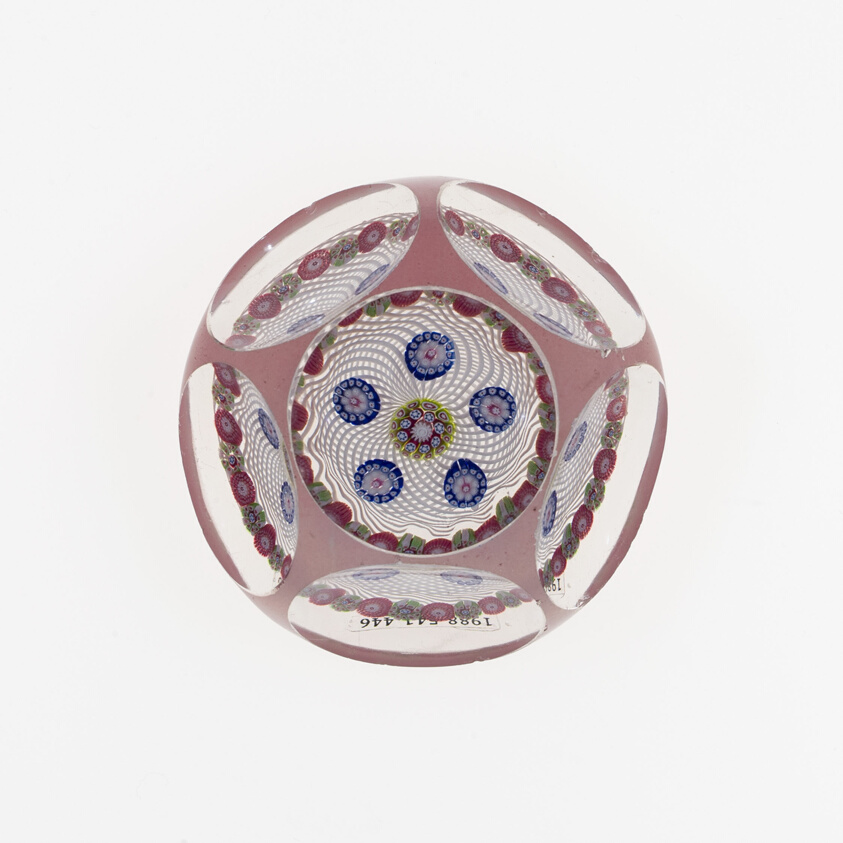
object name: Glass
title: Paperweight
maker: Saint-Louis Glassworks (Cristalleries de Saint-Louis); Lorraine, France, founded 1586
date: c. 1845–60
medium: Glass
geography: Saint-Louis-lès-Bitche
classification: paperweight; glass